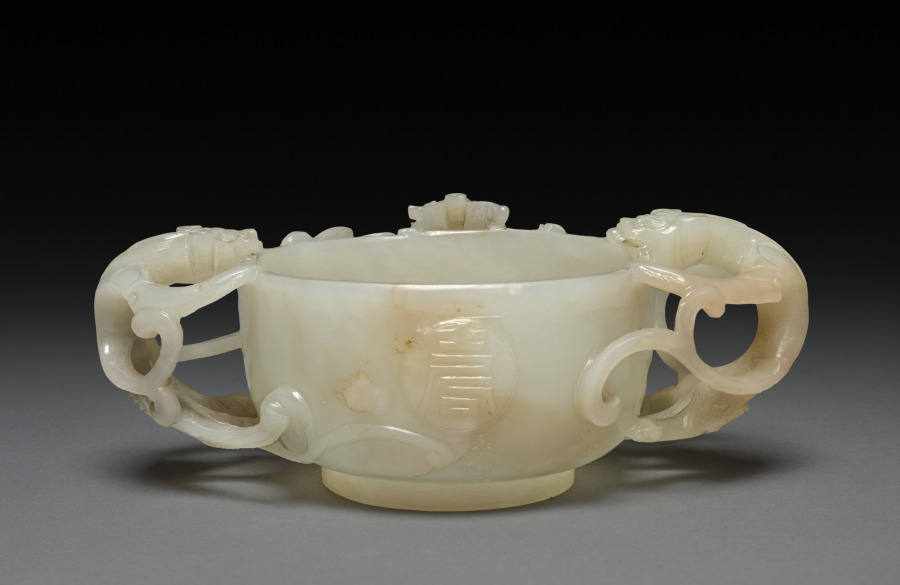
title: Cup with Dragon Handles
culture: China, Qing dynasty (1644-1911), Kangxi reign (1662-1722)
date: 1662–1722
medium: Pale gray-green white jade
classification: Jade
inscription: 萬壽長春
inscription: 壽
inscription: 子剛造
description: Three dragons, auspicious symbols for good fortune, grasp the rim of this bowl. A large shou (longevity) character is visible on the outside wall. Drinking cups with dragon handles were elite luxuries. The yellowish-white color and refined techniques are characteristic of Suzhou workshops that served the court, scholar-officials, and the merchant class. The optimistic attribution to Lu Zigang (late 1500s), a jade master recorded to have been active in Suzhou, suggests that its maker used the master’s name to attract wealthy clients eager to demonstrate their refined taste and connoisseurship.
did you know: Auspicious inscriptions on the base and front of the jade cup convey wishes for longevity.